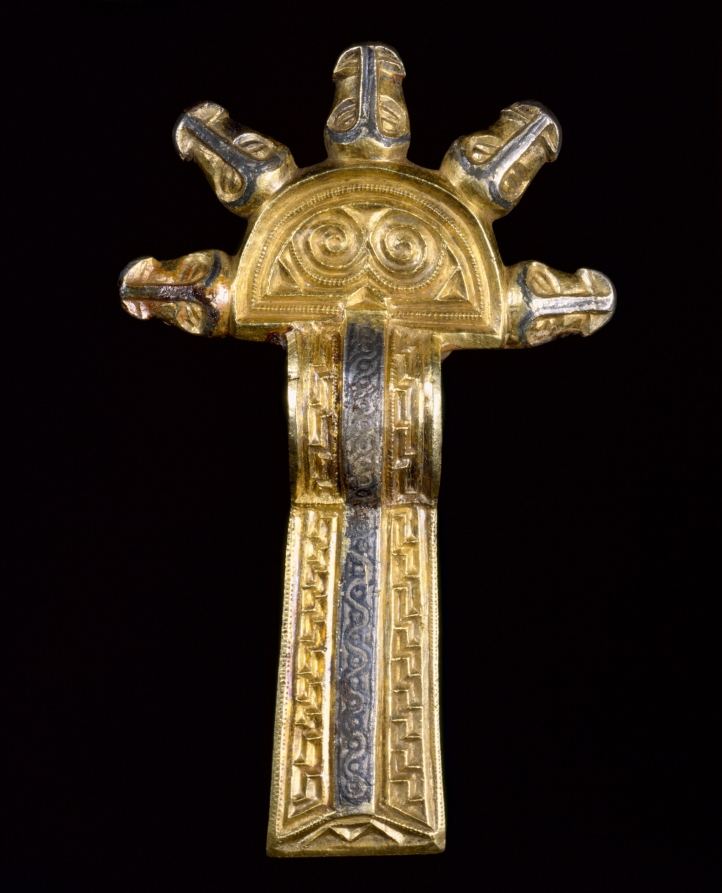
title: Fibulae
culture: Alemannic, Migration Period, 6th-7th century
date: 500s-600s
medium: cast silver, parcel-gilt, with niello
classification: Jewelry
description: A woman of high rank might have worn these twin fibulae on her shoulders, one fastening her inner garment on the right, the other her outer garment on the left. She might also have suspended them from her belt as decorative ornaments.